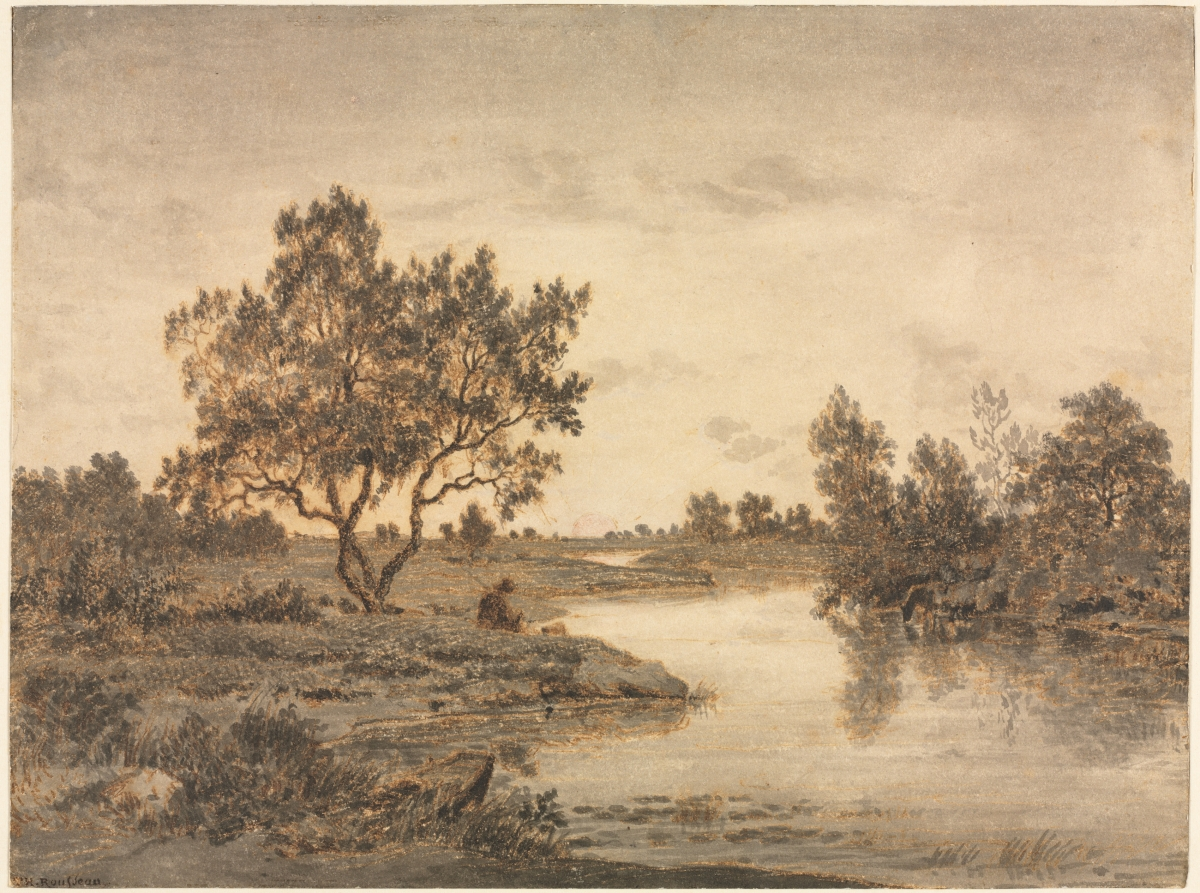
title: The Fisherman (Le Pêcheur)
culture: France, 19th century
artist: Théodore Rousseau (French, 1812–1867)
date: c. 1840–45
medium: pen and brown ink and brush, gray and black wash (scratched away in places), with touches of pink watercolor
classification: Drawing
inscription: signed, lower left, in brown ink: TH. Rousseau ; VERSO OF SECONDARY SUPPORT, upper left, in graphite: 2830 [circled] ; upper left, in graphite: Th Rousseau / The Fisherman / id. x. x. ; upper left, in graphite: 52149 ; VERSO OF TERTIARY SUPPORT, upper right, in black fiber-tipped pen: D 19 [sideways]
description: The quintessential Barbizon artist, Rousseau was romantically in love with nature. He spent the better part of twenty years living in near poverty in a cottage in the village of Barbizon, painting in a converted barn. The Fisherman is an early drawing by the artist, probably executed on the outskirts of Paris. The tree, the foreground grasses and rocks, and the humble form of the fisherman at rest are rendered with great specificity. Rousseau thought of each tree in the Forest of Fontainebleau as being almost human, each marked by a particular fate and struggle.